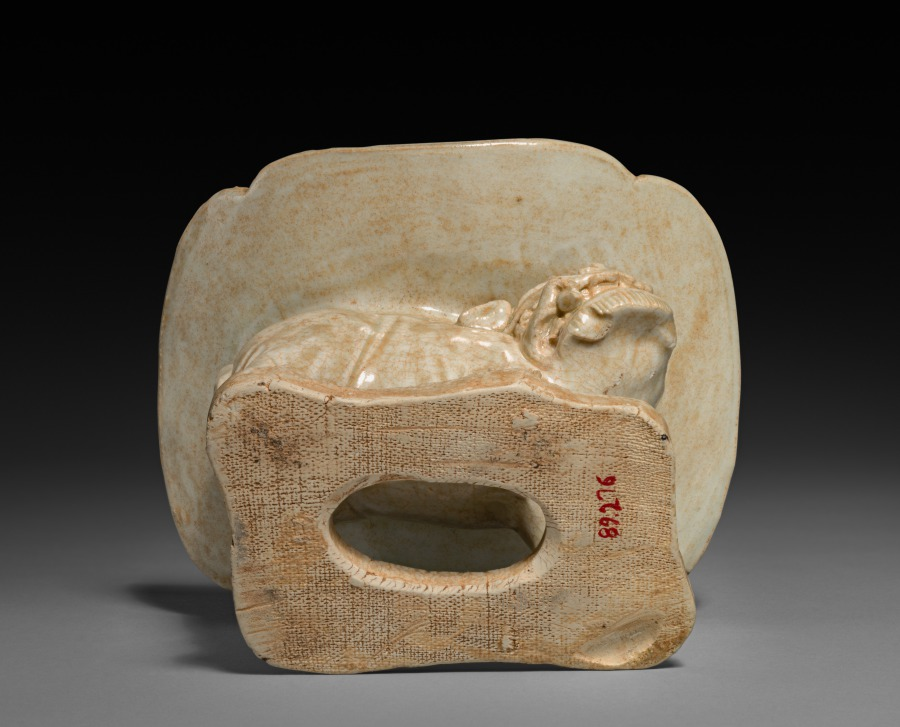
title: Pillow with Lion Base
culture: China, Northern Song dynasty (960-1127)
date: 1000s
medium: Glazed stoneware, qingbai ("blue-white") ware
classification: Ceramic